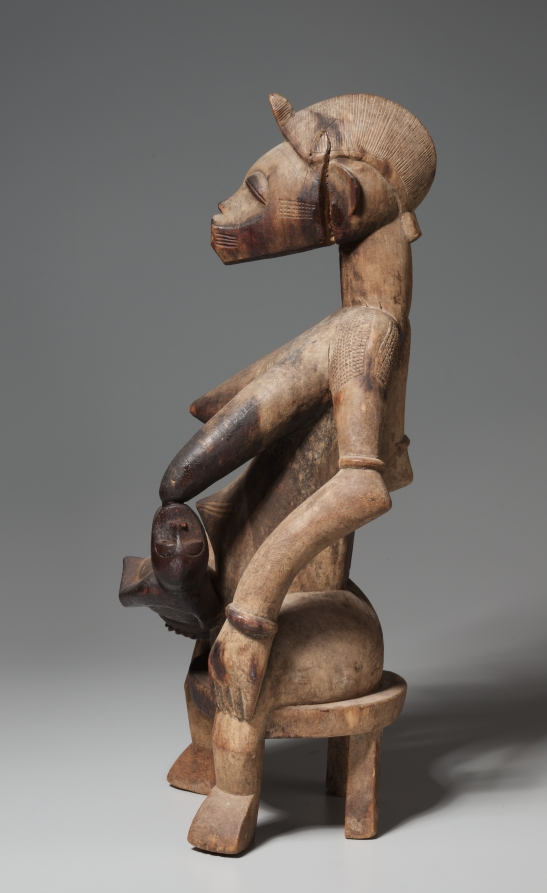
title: Nursing Woman with Child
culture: Africa, West Africa, Côte d'Ivoire, reportedly Korhogo area, Senufo-style carver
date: 1800s-1900s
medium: Wood and organic material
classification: Sculpture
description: Beyond its specific depiction of a mother nursing her child, this sculpture symbolizes a larger concept of ancestral motherhood that is central to Senufo society, in which cultural inheritance is matrilineal. The darkened areas of wood come from oils applied to its surface as both libations and surface protectants. In some Senufo beliefs, one of the most important founding ancestors is the Great Mother or Ancient Woman (Katyeleeo or Maleeo). In groups that believe in the Great Mother, she suckles male initiates with the "milk of knowledge." Through this process, youths gain the information they need to become adults (that is, fully human). The simplified appearance of the "child" in this sculpture reflects his unformed, pre-initiated state.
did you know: The mother’s face, adorned with incisions and markings, resembles that of women who have reached puberty.